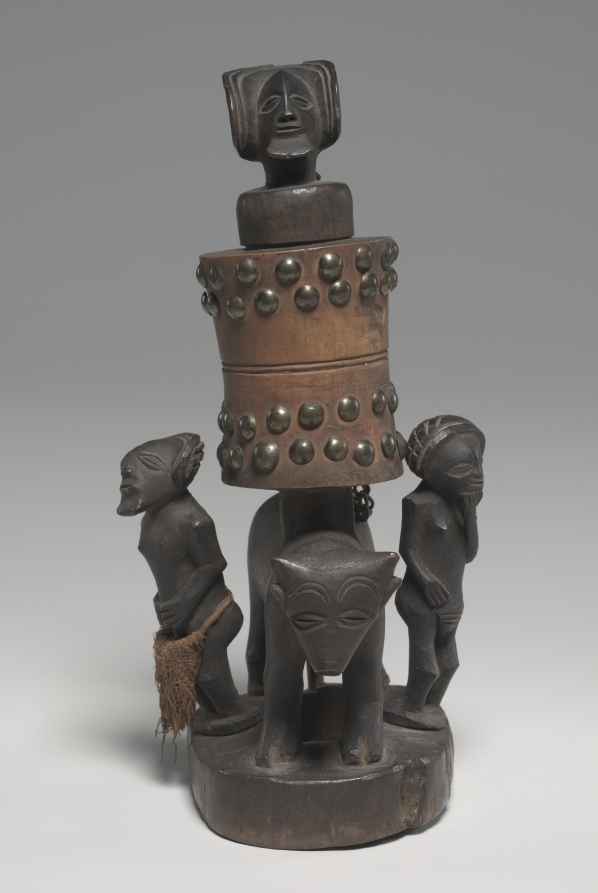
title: Snuff Mortar (Tesa Ya Ma Kanya)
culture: Africa, Central Africa, Angola or Democratic Republic of Congo, Chokwe carver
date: late 1800s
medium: Wood, upholstery studs, cloth, and metal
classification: Tool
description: Tobacco, introduced into Africa in the 16th century, became the prerogative of leaders. As patrons of the arts, Chokwe chiefs commissioned elaborate pipes and mortars as part of their court regalia for display during public gatherings.